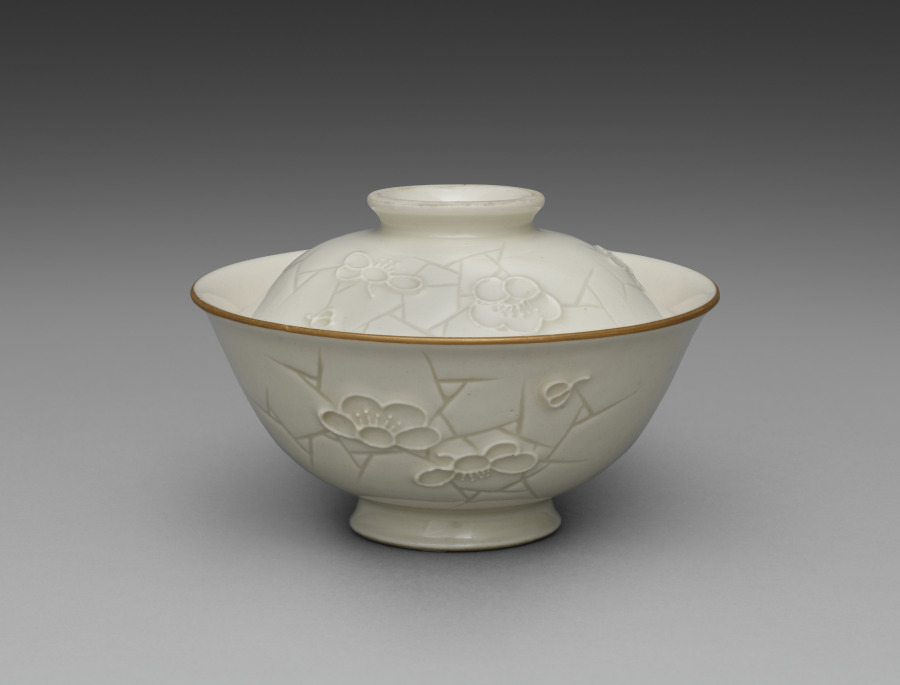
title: Covered Bowl from Dining Set with Plum Blossoms and Cracked-Ice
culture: Japan, Meiji period (1868–1912)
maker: Seifū Yohei II (Japanese, 1844–1878)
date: c. 1875–78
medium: Porcelain with molded designs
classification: Ceramic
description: Each item in this set has a delicate low-relief design of flowering plum branches over scattered, intersecting lines meant to resemble the cracked-ice surface of a frozen body of water and is signed on the base in gold pigment. While Yohei II produced many fine works in underglaze blue, like those produced by Kiyomizu Shichibei, he also made works in quite different styles later in his career, from the early 1870 s. In 1873, he was appointed purveyor to the Industrial Center of Kyoto Prefecture, a designation associated with Kyoto’s efforts to reach an international market through the port of Kobe; and from 1875 until his death, he was involved in national-level projects to present Japanese ceramics across the world. It was during this period that Yohei III was apprenticed to Yohei II, and it has been suggested that this set may in fact be an early example of Yohei III’s work, which he signed with his teacher’s name. Decorated with flowers resembling Japanese textile motifs, the set calls to mind the design of Yohei II’s pair of vases with plum blossoms in the Victoria and Albert Museum. Here, the elaborate trees created for a formal public exhibition setting have been translated into the approachable blossoms of the genteel domestic environment. While the designs are consistent across the pieces, each raised flower petal and pistil and each incised line in the ice was done by hand, so the cups, bowls, and dishes are similar yet unique. The bottoms of two boxes once identified the set’s owner, but the information has been deliberately obscured with black ink. However, inscriptions still visible appear to indicate two occasions, once at the end of July 1886 , and once again in June 1916 , when parts of the set were requested from Hokura in Niigata Prefecture. The location corresponds to a neighborhood in the present-day city of Jōetsu. The surname Tsuji 辻 also appears on a paper tag affixed to one of the box cloths. Future research may possibly reveal more about their provenance. A vase by Yohei III in a private collection combines the formal grandeur of the Yohei II vases in the Victoria and Albert Museum with the gentler design of this dining set, placing flowering plum trees against soft, scalloped-edge clouds resembling those in golden screens.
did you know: The dining wares have a creamy white coloration that the four boxes containing them identify as Korean in style.